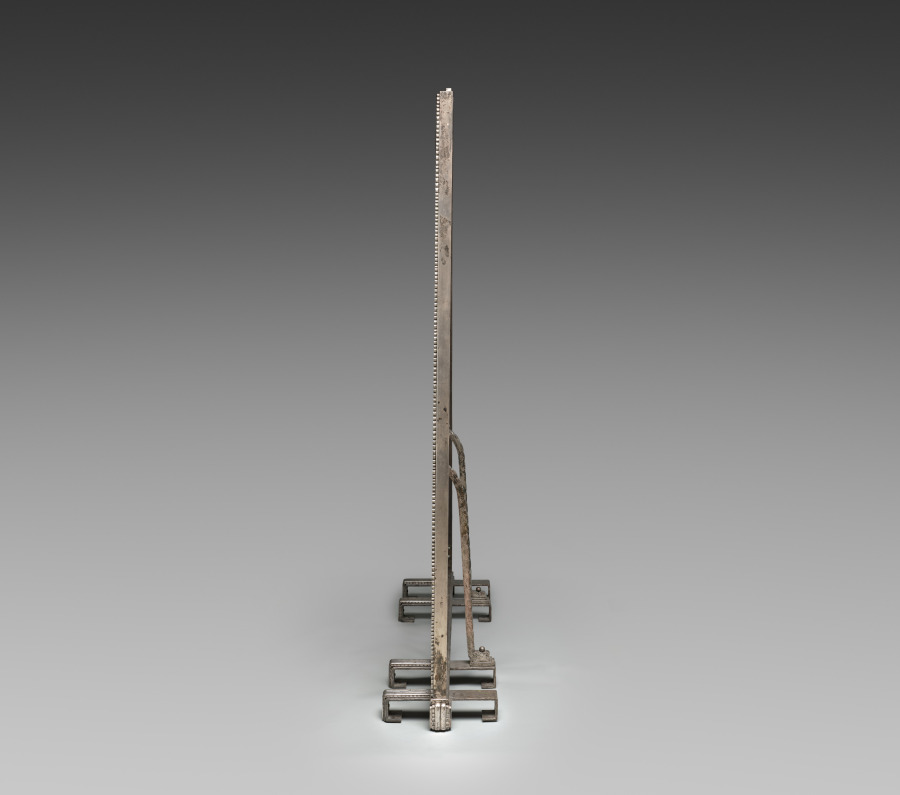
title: Muse with Violin Screen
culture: America, Ohio, Cleveland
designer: Paul Fehér (American, born Hungary, 1898–1990)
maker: Rose Iron Works (America, Ohio, Cleveland, est. 1904)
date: 1930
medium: Steel, brass; silver and gold plating, cotton velveteen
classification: Metalwork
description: Since the early years of the 20th century, the Rose Iron Works, a Cleveland supplier of architectural ornament, has produced distinguished metalwork. The company’s founder, Martin Rose, was born in Austria-Hungary and studied ornamental metalsmithing in Vienna prior to immigrating to Cleveland in 1902. In the 1920s, he hired a talented young Parisian designer, Paul Fehér, to work for the firm. Fehér’s designs, culminating in this massive screen, brought a modern European sensibility to the Rose Iron Works production. With its geometric patterning, highly stylized and abstracted natural forms, and the central figure reminiscent of the celebrated jazz singer Josephine Baker, this screen reflects the classic motifs of Art Deco design.